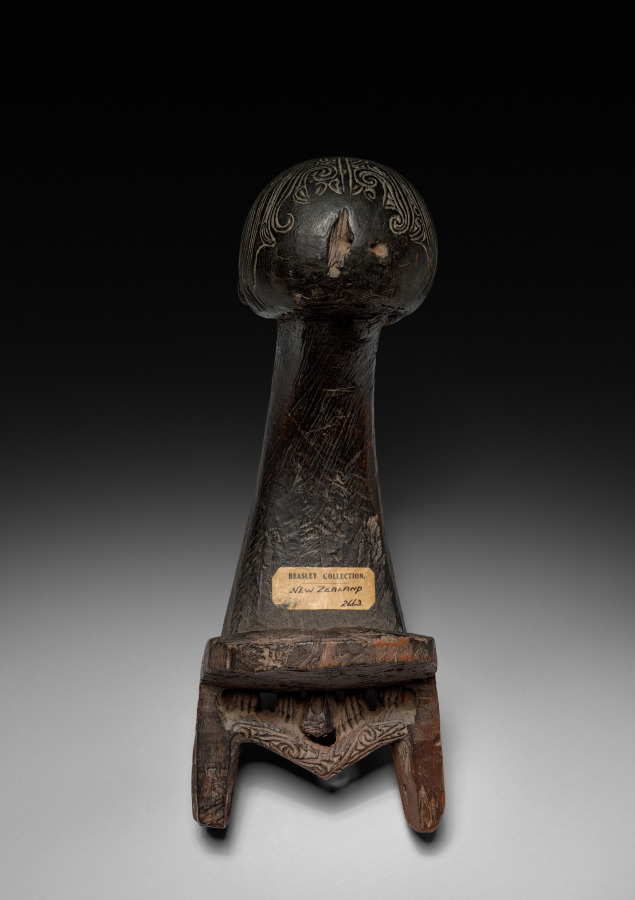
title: Fishing Canoe Prow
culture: Polynesia, New Zealand, Maori people, 19th century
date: 1800s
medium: wood with haliotis (pearl) shell inlay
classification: Sculpture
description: Intricate surface patterning characterizes Maori wood carvings. The swirls and spirals covering the face on this canoe prow replicate traditional facial tattoo patterns. Similar designs were used for post and gable figures that adorned both dwellings and compounds.